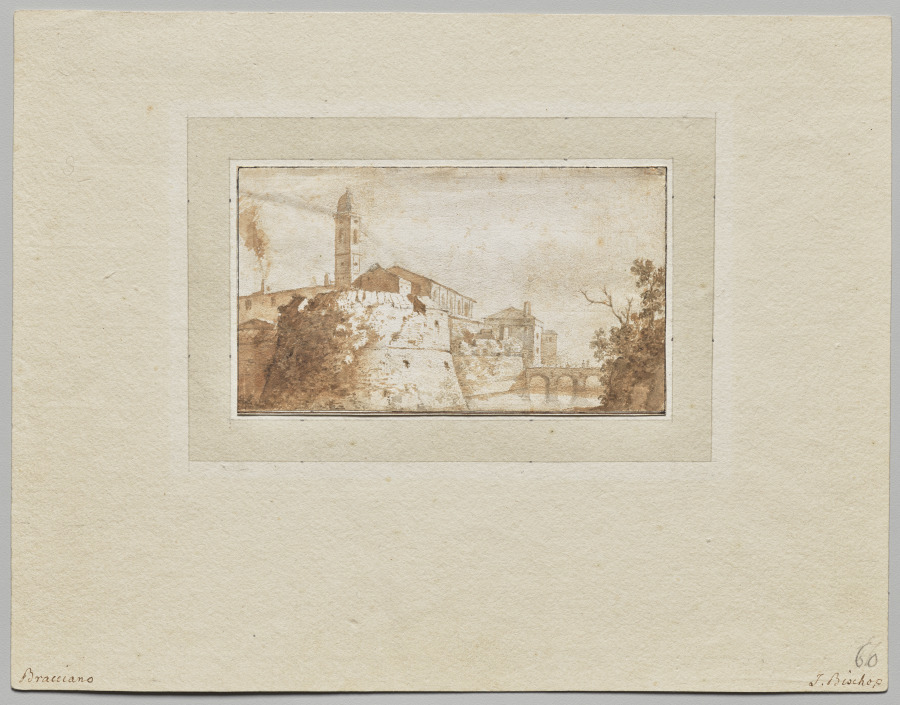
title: A View of Bracciano with the Church of S. Maria Assunta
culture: Netherlands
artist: Bartholomeus Breenberg (Dutch, 1599–1657)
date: c. 1619–33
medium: Brown and gray inks and washes applied with point of brush and brush, with traces of graphite underdrawing on cream antique laid paper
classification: Drawing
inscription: Written in brown ink on recto of mount, lower left: "Bracciano"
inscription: Written in brown ink on recto of mount, lower right: "J. Bischop"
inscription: Written in pencil on recto of mount, lower right: "610"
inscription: Written in pencil on verso of mount: "53"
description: In the early 1600s, artists from Northern Europe began to take long trips to Italy as part of their artistic training. Bartholomeus Breenberg traveled to Italy around 1620 and probably stayed for at least 12 years. While there, he sketched ancient ruins and the countryside, features he would use in his paintings when he returned to Amsterdam in the 1630s. The area around the Lago di Bracciano, a volcanic lake northwest of Rome, was home to several medieval villages that provided charming vistas for artists. In his view, Breenberg emphasized the crumbling turret of a medieval castle in Bracciano in front of the ordered, linear outline of the Church of Santa Maria Assunta beyond. Combining gray and brown ink washes to plot gradations in tone, he created vivid contrasts of light and shade, capturing the effects of the bright Italian sunshine.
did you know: In the early 17th century, European artists were just beginning to make sketches such as this one outdoors and onsite.